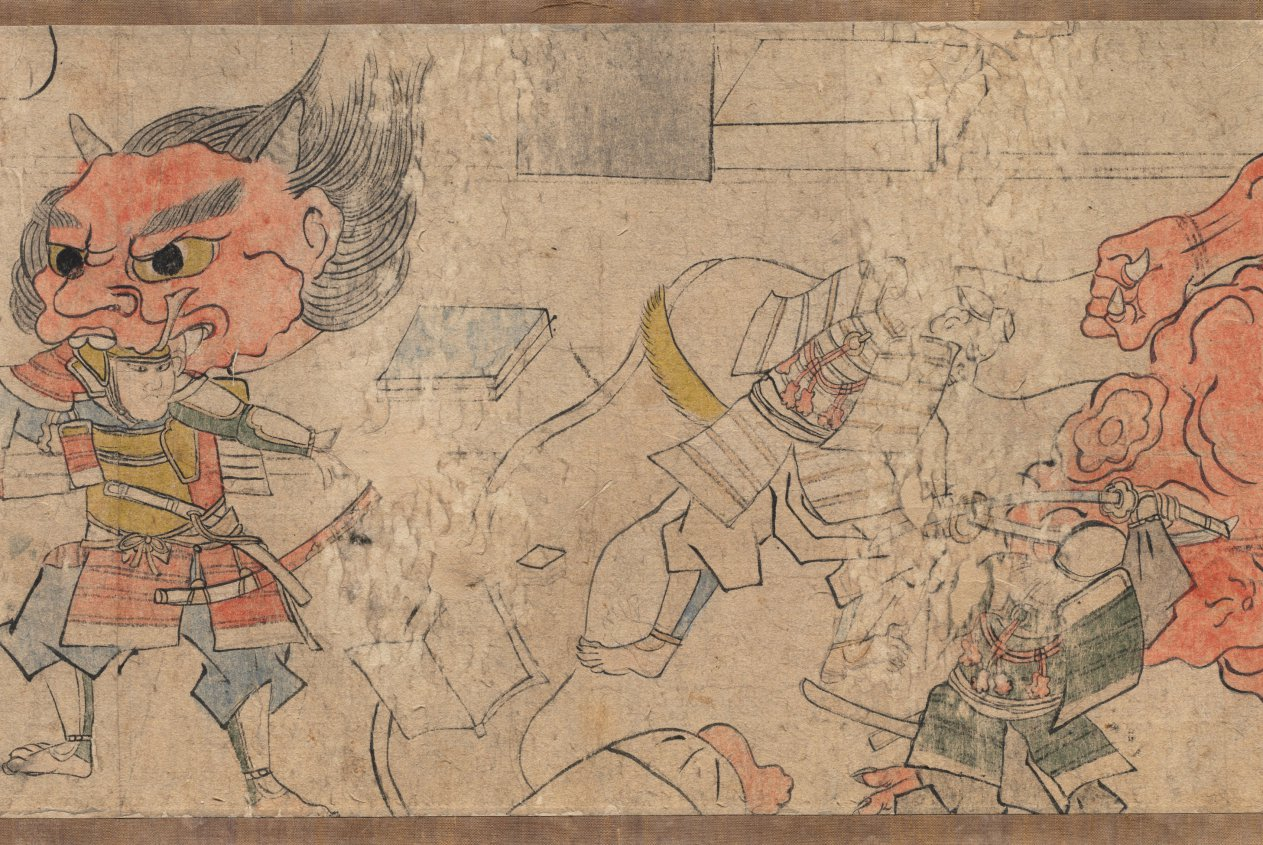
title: Oeyama Engi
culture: Japan, Edo period (1615–1868)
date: 1615–1868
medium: one of a pair of handscrolls; ink and color on paper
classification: Painting